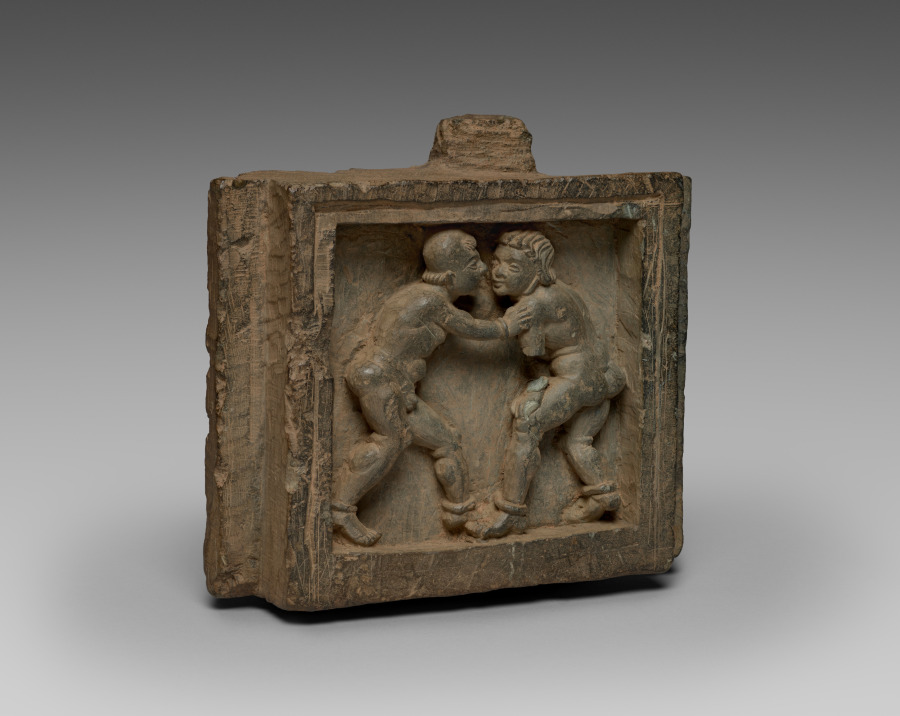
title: Architectural Bracket with Wrestlers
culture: Pakistan, Gandhara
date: 100s–200s CE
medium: schist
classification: Sculpture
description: This sculpture probably derived from Greco-Roman prototypes of nude athletes, but here it has probably been transposed into a scene from the boyhood of the Buddha, when it is said that he excelled in all forms of athletics.